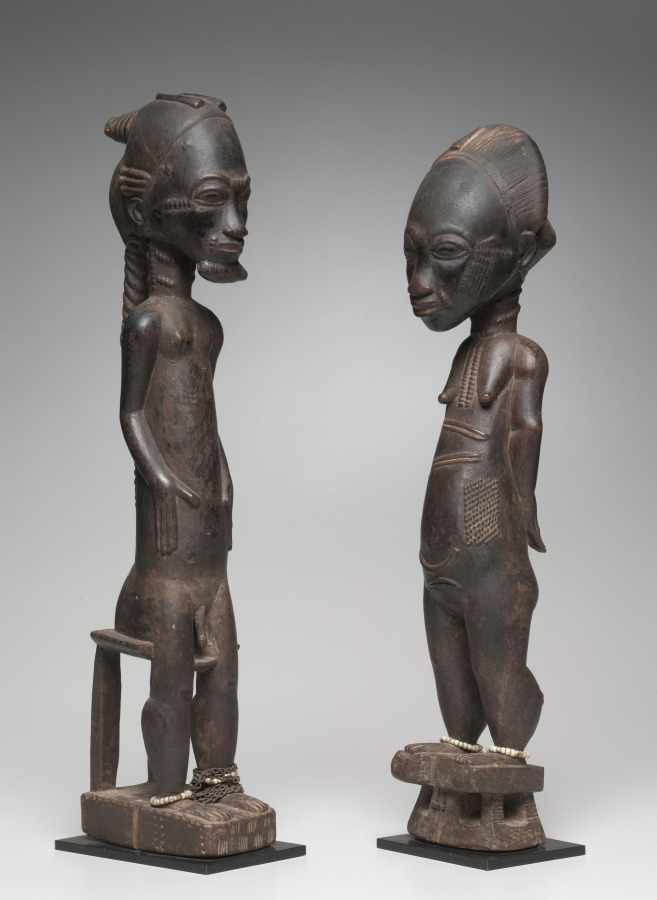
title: Figure Pair (asye usu)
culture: Africa, West Africa, Côte d’Ivoire, Baule-style carver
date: late 1800s–early 1900s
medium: Wood, resin, glass beads, plant fiber, and metal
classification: Sculpture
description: Baule figures carved as pairs usually represent untamed spirits of the wilderness called asye usu. These spirits may intervene in the lives of individuals by taking possession of them. If this possession does not result in madness, it can lead to the human host’s becoming a diviner who can enter into a trance to reveal the causes of ailments and other misfortunes. People who feel their lives are being interrupted by the asye usu commission carvings representing idealized male and female forms whose grace and beauty in both anatomy and adornment will seduce the spirits and compel them to use the sculptures as their temporary homes.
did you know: Baule artists looked to the world around them to capture contemporary ideas and ideals of beauty; these figures have hairstyles that would have been worn when the sculptures were carved.